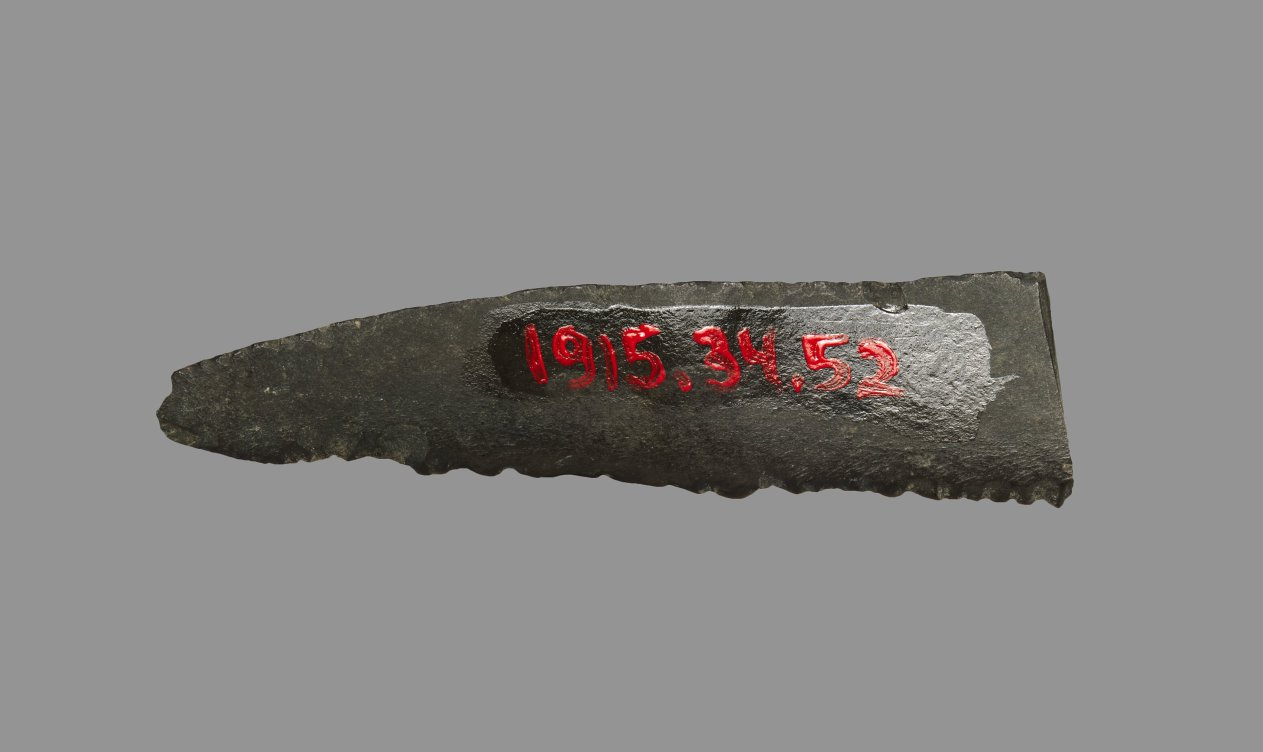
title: Sickle Blade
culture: Egypt, Middle Kingdom (2040–1648 BCE), Dynasty 12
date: 1980–1801 BCE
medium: flint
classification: Implements